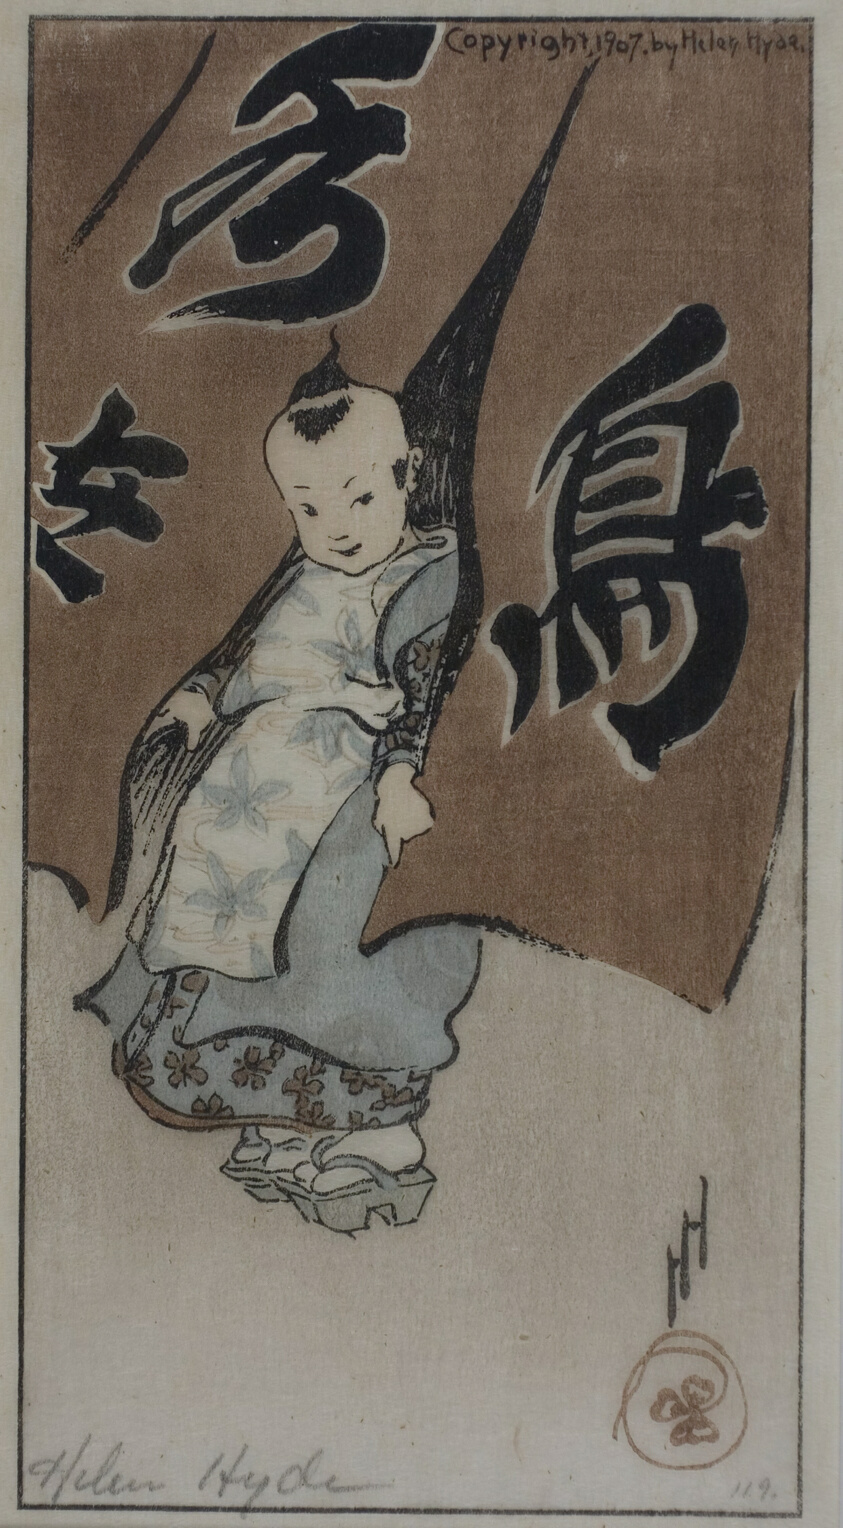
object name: Print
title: The Red Curtain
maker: Helen Hyde (American, 1868-1919)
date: 1907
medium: Color woodcut on cream wove paper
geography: United States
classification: prints and drawing; woodcut; print